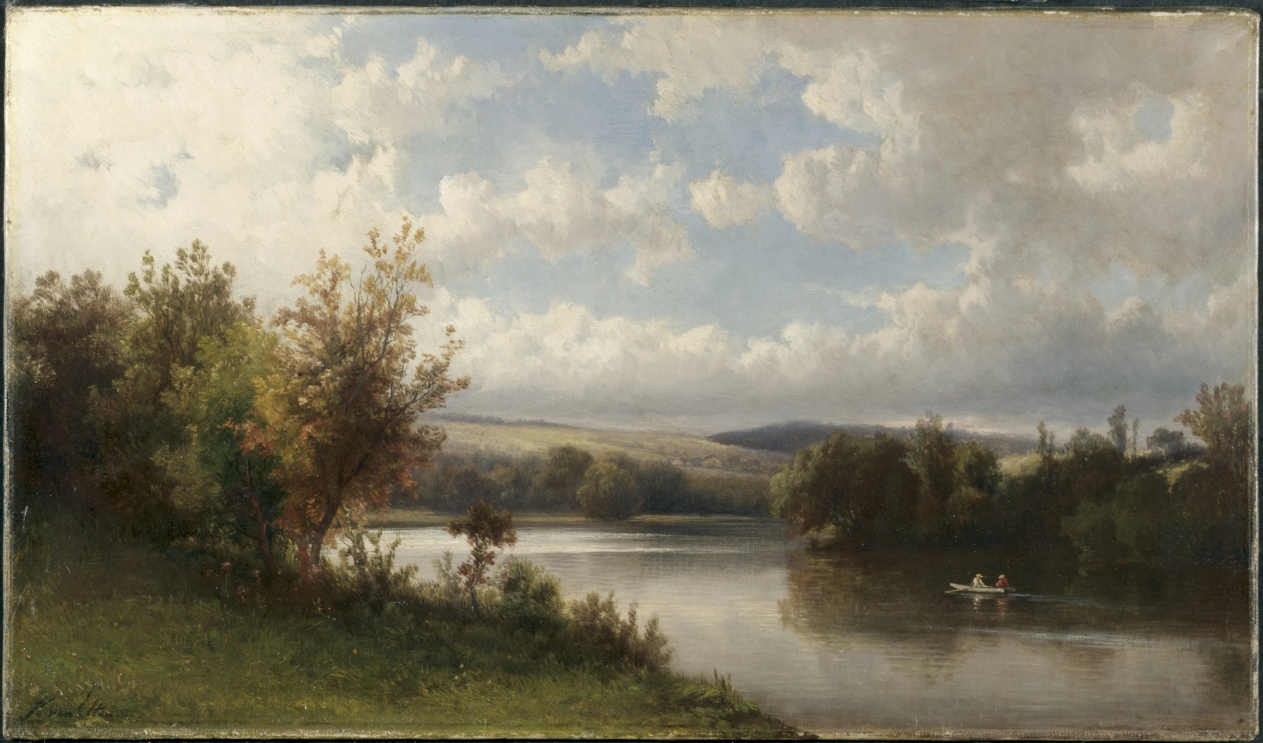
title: Landscape near Granby, Connecticut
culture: America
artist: Hendrik Dirk Kruseman van Elten (American, born The Netherlands, 1829–1904)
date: 1870s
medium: oil on canvas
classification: Painting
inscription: signed lower left: K. van Elten; graphite inscription on the bottom tacking margin at the left side: "Milford river"